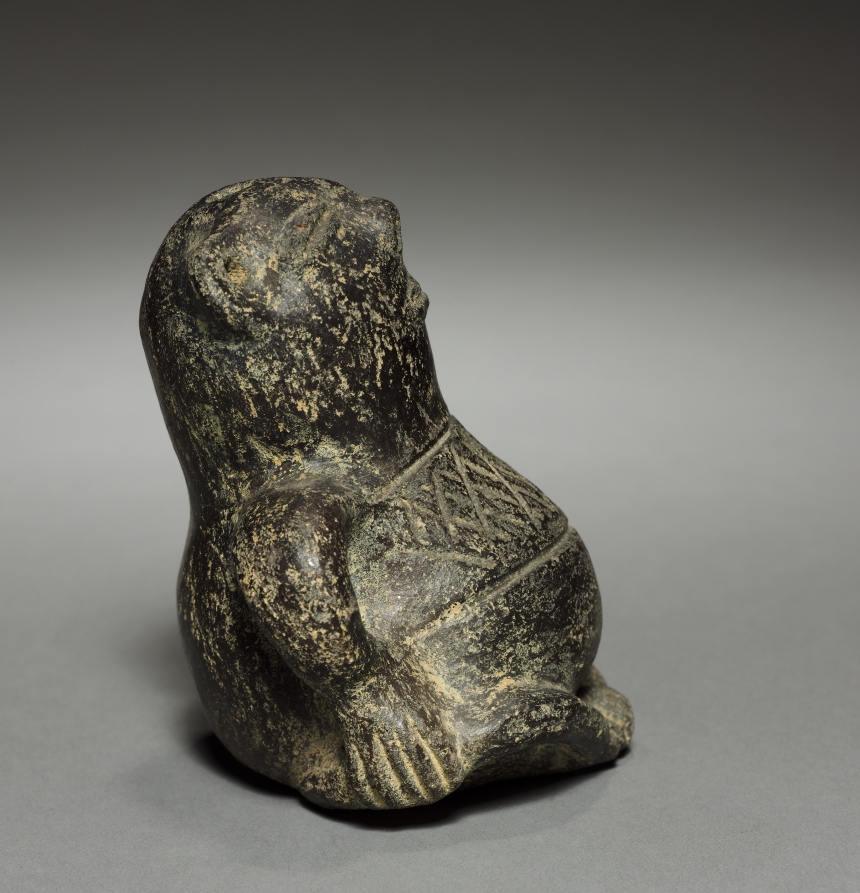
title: Seated Figure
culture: Colombia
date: before 1921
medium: pottery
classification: Ceramic